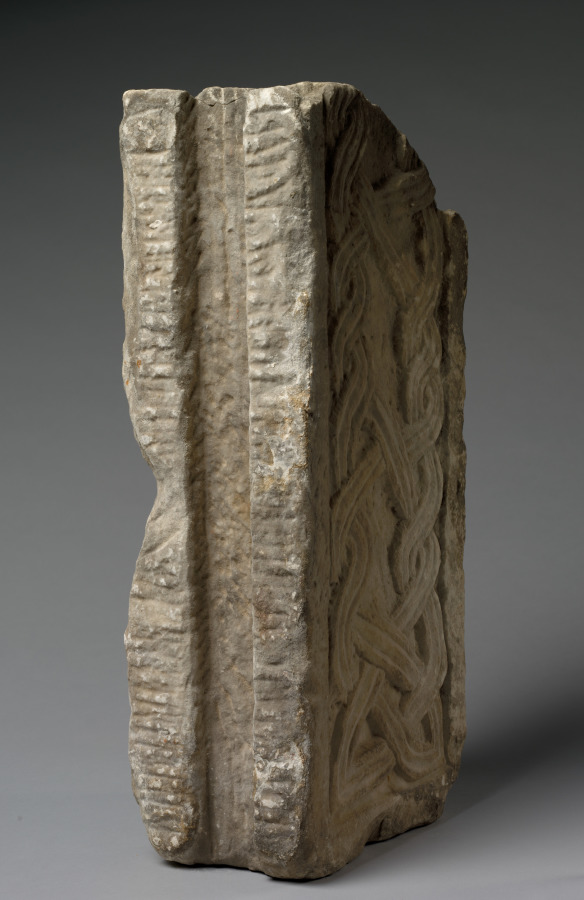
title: Transenna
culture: Lombardic, Italy, Migration period, 8th-9th Century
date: 700s-800s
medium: marble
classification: Sculpture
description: In Christian architecture a transenna is an openwork screen of stone or metal enclosing a shrine. These transenna elements were found in Rome; the posts were said to have been excavated on the Coelian Hill and may have originally formed part of the transenna of the Church of San Saba. The Lombards were an ancient Germanic-speaking tribe that settled in Italy after 568. Their artistic tradition was originally centered on small objects of personal adornment like buckles and brooches. After occupying Italy, the Lombards found themselves in contact with large-scale sculpture of classical and early Christian origin that, by the end of the 700s, they had learned to adopt and imitate, as seen here.